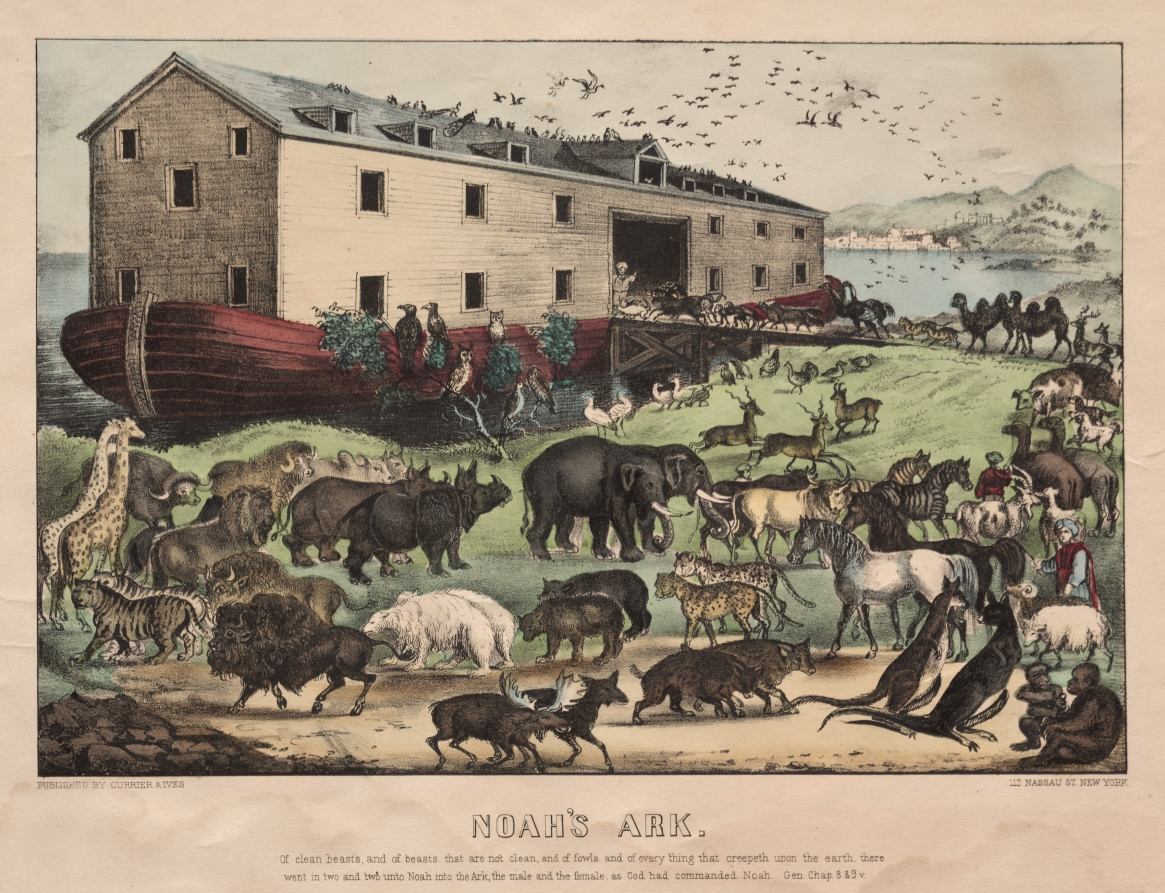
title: Noah's Ark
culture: America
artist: and James Merritt Ives (American, 1824–1895)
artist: Nathaniel Currier (American, 1813–1888)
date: c. 1857–72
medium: lithograph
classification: Print